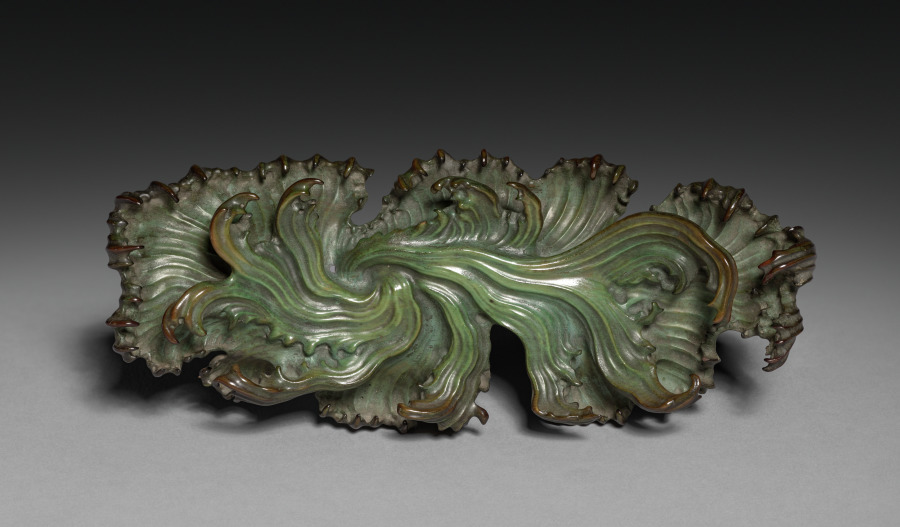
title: Figure of Daoist Immortal He Xiangu (base)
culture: China, Qing dynasty (1644-1911)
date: 1700s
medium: Colored ivory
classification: Wood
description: He Xiangu is one of the Eight Immortals in the Daoist pantheon. She was thought have been a real person who lived in the Tang dynasty, originally named He Qiong. As a teenager, she was instructed in a dream to eat powdered mica to become immune from death and to vow to remain unmarried. She did so and became an enlightened practitioner of Daoism. In this delicate carving, He Xiangu is placidly seated in a gnarled and knotty wooden raft amid green-tinted ivory waves. In front of her rests a bamboo basket filled with objects associated with Daoist immortality, while she holds a branch of lingzhi fungus.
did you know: He Xiangu's boat rests on a wave-shaped base carved from ivory that has been dyed green.